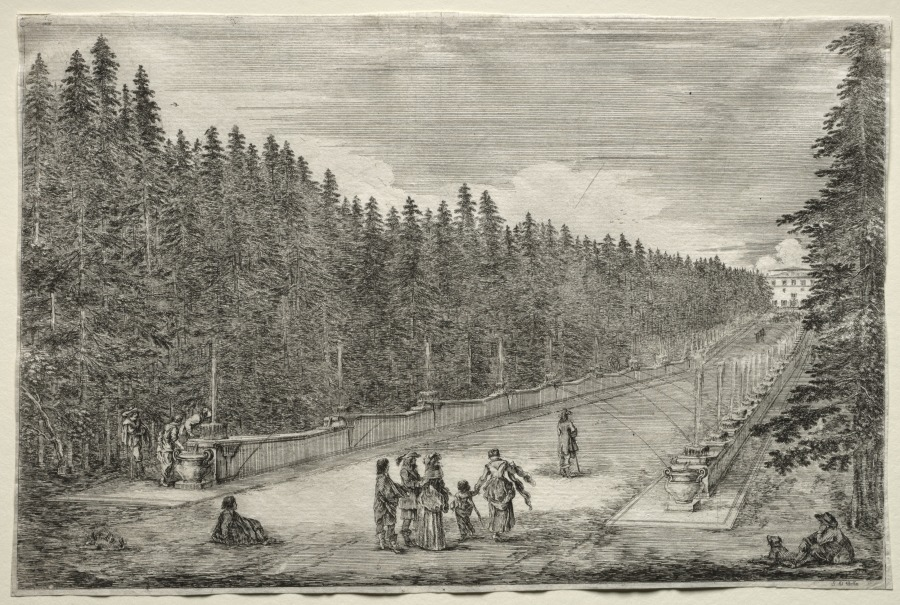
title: Views of the Villa of Pratolino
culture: Italy, 17th century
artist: Stefano Della Bella (Italian, 1610–1664)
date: c. 1653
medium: etching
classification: Print